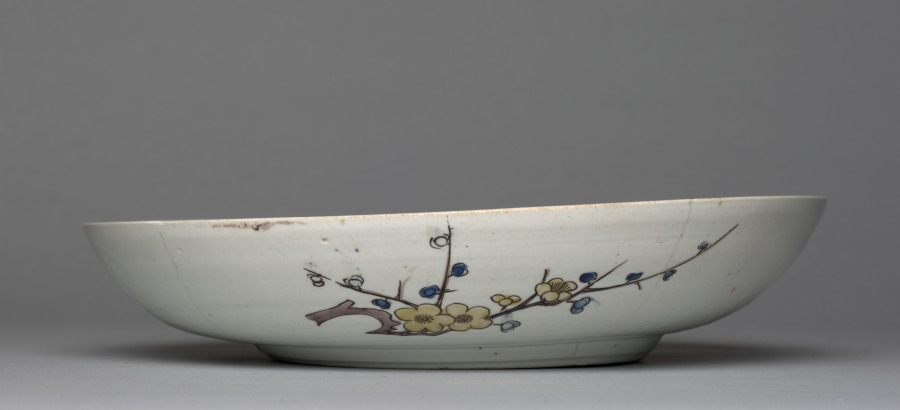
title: Plate with Bird and Flower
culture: Japan, Meiji period (1868–1912) or Taishō period (1912–26)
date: early 1900s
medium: Porcelain with overglaze enamel (Ko-Kutani revival style)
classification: Ceramic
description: This dish is a sophisticated example of later ceramists reinterpreting earlier styles of Japanese porcelain. The colors and patterns used look similar to some works produced on the island of Kyushu in the1600s and 1700s. However, the idea to combine alternating blocks of yellow, green, purple, and blue with a "Chinese grasses" (karakusa) pattern around the rim of the dish is one hit upon in the early 1900s by an artist familiar with the colors and patterns of earlier works.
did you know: Porcelain must be fired at a high temperature to achieve its strength and semitranslucent surface.